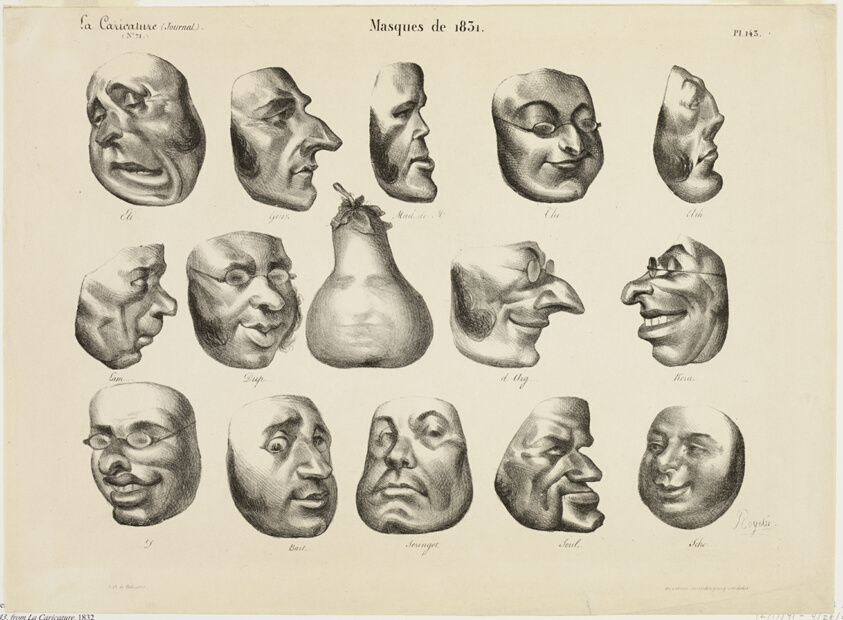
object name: Print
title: Masks of 1831, plate 143 from La Caricature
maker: Honoré Victorin Daumier; French, 1808-1879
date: 1832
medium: Lithograph in black on white wove paper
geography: France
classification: lithograph; print; prints and drawing